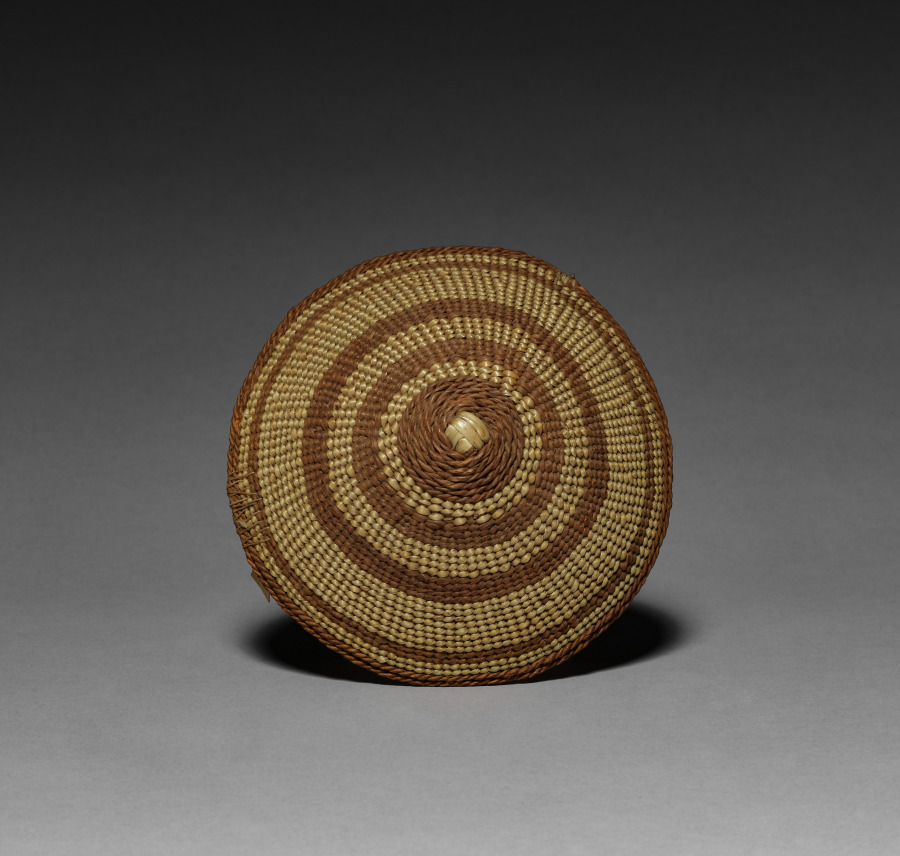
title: Tobacco Basket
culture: California, Yurok, late 19th century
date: c 1875– 1900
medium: twined grasses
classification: Basketry